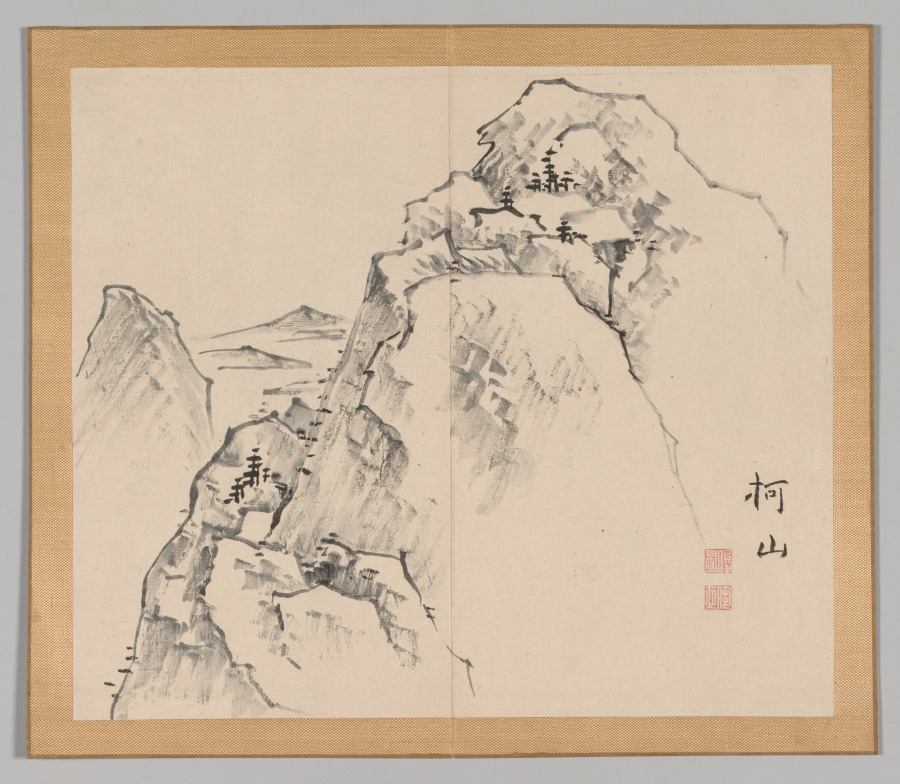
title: Reverberations of Taiga, Volume 1 (leaf 27)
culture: Japan, Edo period (1615–1868)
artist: Aoki Shukuya (Japanese, d. 1802)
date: mid- to late 1700s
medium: double-leaf from a pair of albums; ink and light color on paper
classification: Portfolio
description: Traditionally, young painters in Japan began their studies with an established master-painter. The master's compositions invariably became models that the apprentice copied to learn various ink and brush techniques. Shukuya was a pupil of the famous Kyoto artist Ikeno Taiga, whose style is reflected in these sketches of rocks, trees, and mountains.